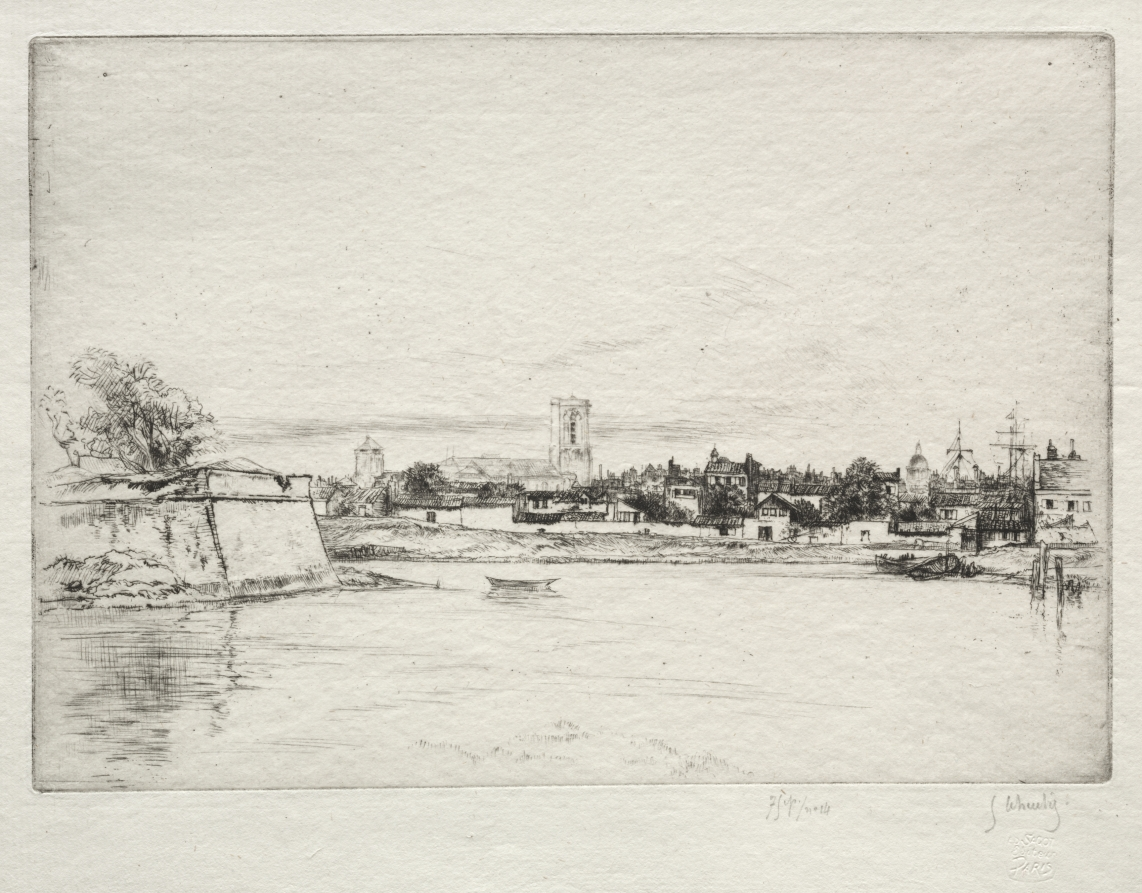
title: Le Petit St. Eloi, La Rochelle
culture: France, 19th century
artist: Gustave Leheutre (French, 1861–1932)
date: 1923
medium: etching and drypoint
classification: Print